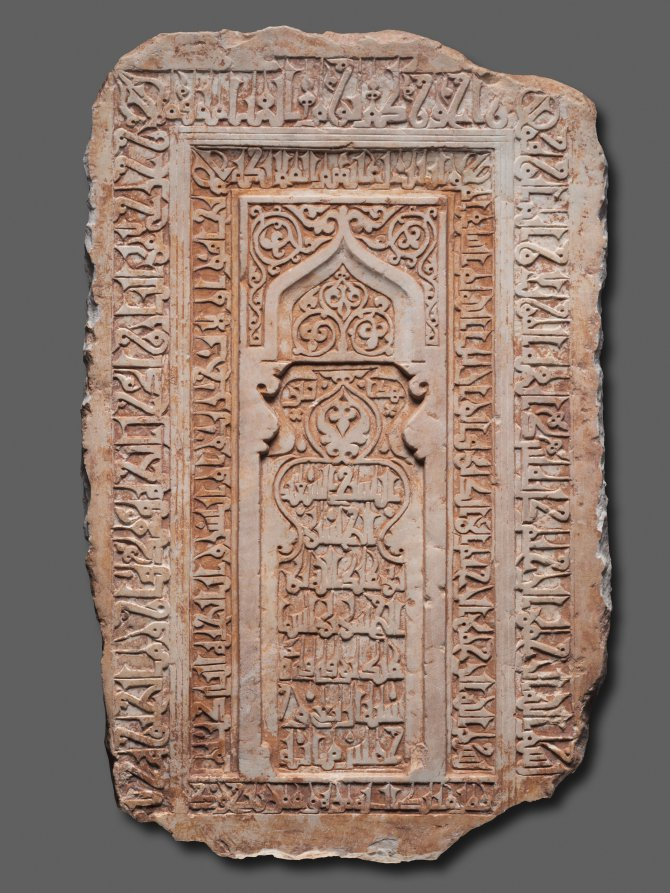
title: Inscribed Tombstone of Shaikh al-Husain ibn Abdallah ibn al-Hasan (died 1110)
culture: Iran, Yazd, Seljuk Period, early 12th Century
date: 1110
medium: limestone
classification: Sculpture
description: Arabic calligraphy, the supreme art form in the Islamic world, enhances this tombstone. The elegant Arabic script embellished with leaf tendrils at the top of the tall letters is called floriated Kufic. Verses about paradise from the holy Qur'an border the central arch-shaped niche that resembles a mosque's mihrab, located in the wall closest to the holy city of Mecca. The name of the deceased and the year of his death are recorded within the niche above the names of the carvers: "The work of Abaidallah Murra(?) and 'Umar(?)." The inscriptions from the Qur'an translate as follows: Outer border (read from right to left): "In the name of God, the Merciful, the Compassionate. Every soul shall taste of death; and ye shall only receive your recompenses on the Day of Resurrection. And who so shall escape the fire, and be brought into Paradise, shall be happy. And the life [of this world is but a cheating fruition]" (3:185). Inner border: "In the name of God, the Merciful, the Compassionate. But as for those who say, 'Our Lord is God'; and who go straight to Him, the Angels shall descend to them and say 'Fear ye not, neither be ye grieved, but rejoice ye in the Paradise which ye have been [promised]'" (41:30).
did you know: More work by these two artisans, Ubaydallah Murra and Umar, survives than by any other single artisan working in Yazd during the 1100s. There are only three other collaborative efforts on twelfth-century mijrabs/tombstones of the Yazd area out of a total number of 18 signed pieces.